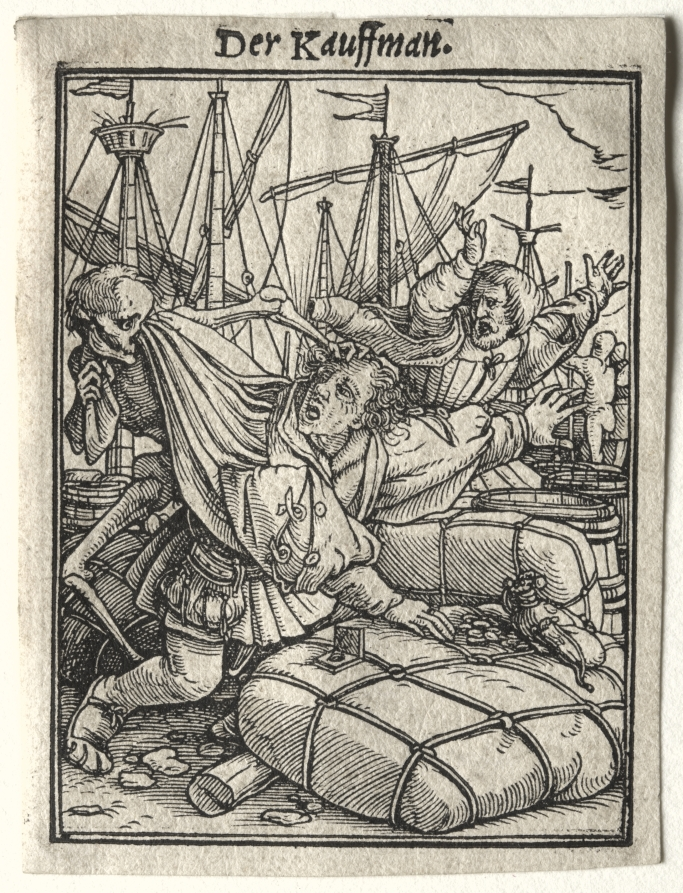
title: Dance of Death: The Merchant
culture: Germany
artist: Hans Holbein the Younger (German, active England and Switzerland, 1497/98–1543)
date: c. 1526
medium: woodcut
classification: Print